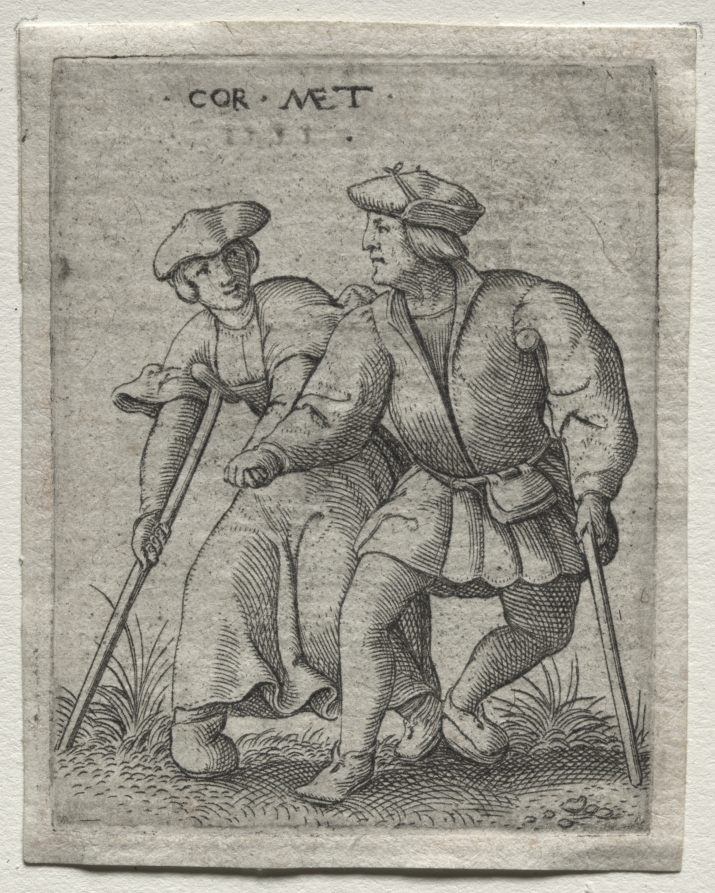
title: Dancing Cripples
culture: Flanders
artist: Cornelis Massys (Flemish, 1510/11–1556/57)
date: 1538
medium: engraving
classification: Print